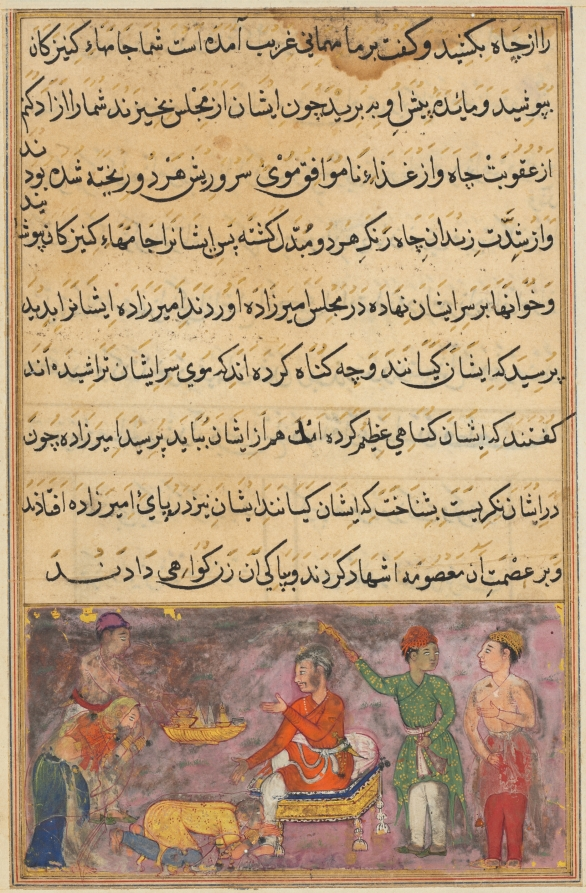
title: The two erring cooks, dressed as maidservants, fall at the prince’s feet and beg forgiveness, from a Tuti-nama (Tales of the Parrot): Fourth Night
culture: Mughal India, court of Akbar (reigned 1556–1605)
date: c. 1560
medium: gum tempera, ink, and gold on paper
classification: Painting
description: Seated on a fine stool in the center, the king is astonished to receive his two handsome cooks, whom he had sent to seduce his soldier’s faithful wife. After she trapped them and kept them prisoner for weeks until the arrival of the king, she shaved their heads and forced them to dress as female servants to shame them for testing her fidelity. Some folios in this manuscript were altered from their original compositions, creating discoloration in many areas. The yellow background was changed to lavender, the legs of the stool were shortened, and the king’s bolster lowered. The manuscript’s patron, the Mughal emperor Akbar, brought artists from many regions of India to work in his court, and some of their compositions and color choices were updated, apparently after they learned of Akbar’s stylistic preferences. This important manuscript, which is almost entirely in the Cleveland Museum of Art’s collection, is critical for understanding the early development of Mughal painting.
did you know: Despite their disguises, the prince recognizes the two cooks.